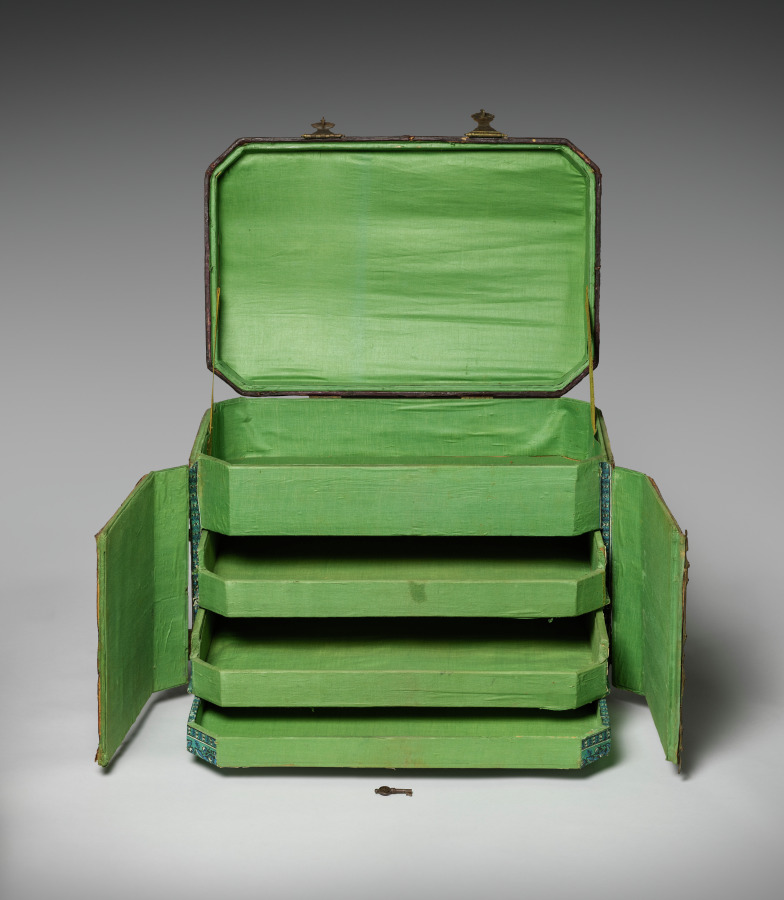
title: Chest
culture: Italy, Venice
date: 1700s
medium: leather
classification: Miscellaneous